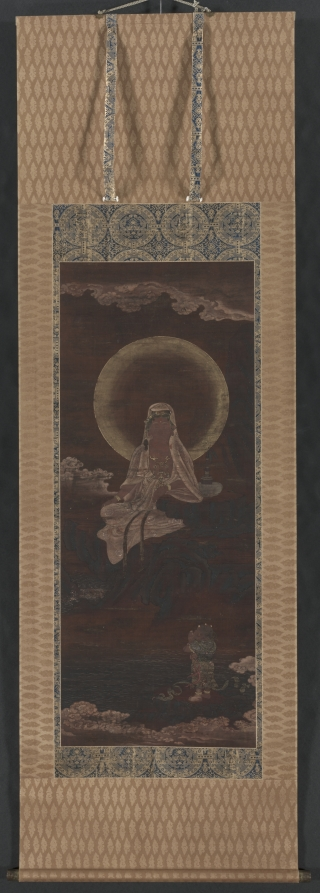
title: Water-Moon Kannon (Suigetsu Kannon)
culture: Japan, Meiji period (1868–1912)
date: 1868–1912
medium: hanging scroll, ink, gold, silver, color, and cut gold-leaf on silk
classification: Painting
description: Kannon represents a primary figure of benevolence and compassion in the Buddhist pantheon. Identified early in Buddhist texts as a close attendant to the Buddha, by the 700s Kannon's popularity soared to such an extent in China, Korea, and Japan that the bodhisattva was often worshipped independently. Here at the lower left, Kannon is depicted with the child Zenzai Dōji (Sakskrit: Sudhana), a wealthy boy who, according to the final chapter of the Flower Garland Sutra, visited Kannon's abode Fudaraka (Sanskrit: Potalaka) during a long journey to learn the bodhisattva path.